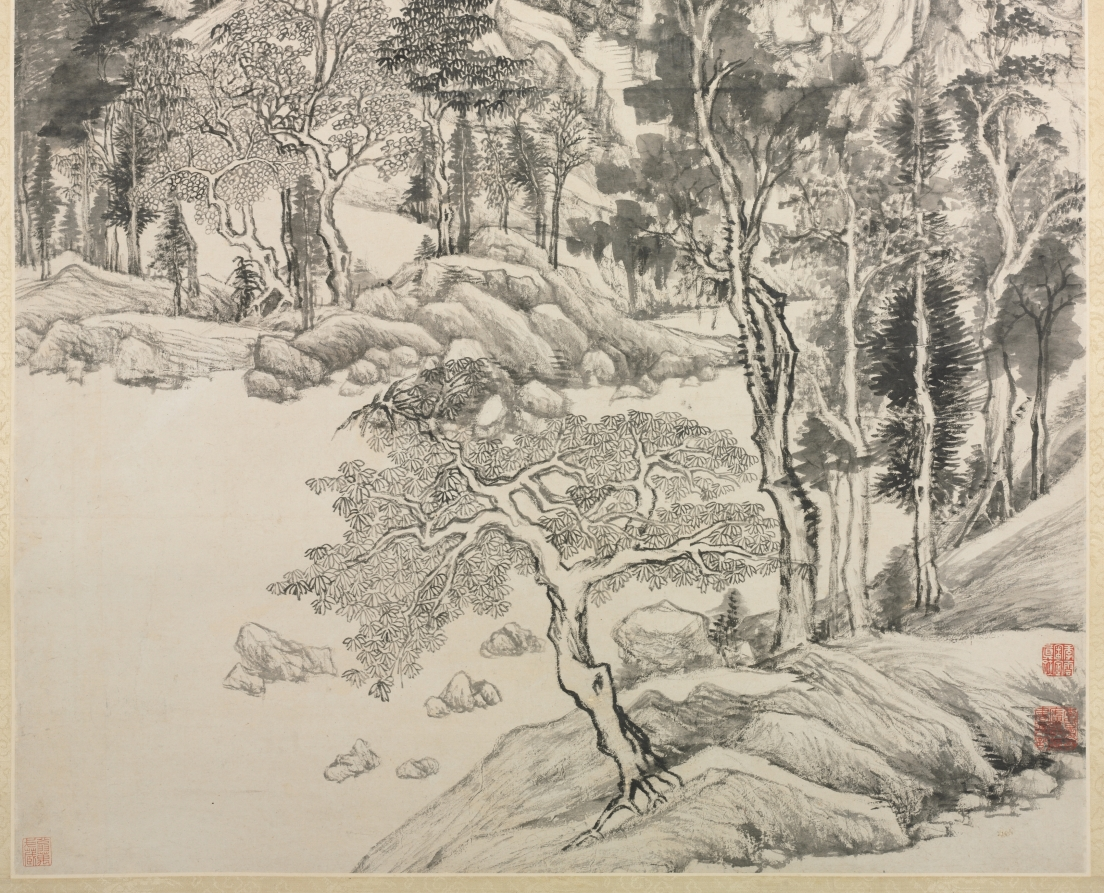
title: Mt. Qingbian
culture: China, Ming dynasty (1368–1644)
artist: Dong Qichang (Chinese, 1555–1636)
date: 1617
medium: hanging scroll, ink on paper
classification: Painting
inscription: Artist's first inscription, signature, and 2 seals: A painting of the Qingbian Mountains in the manner of Beiyuan [Dong Yuan]. In the summer of the dingsi year [1617], on the last day of the fifth month, [I] send this to my senior, Zhang Shenqi. Dong Xuanzai [seals] Zhi zhi hao ri jiang guan 知制誥日講官; Dong Qichang yin 董其昌印.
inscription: Artist's second inscription and signature: Piling irons for ten thousand feet guard the purple sky;/ Where puppies are seen on top of clouds, villages and marketplaces lie./ In the splendor of autumn, where is the most worthy spot to spend the day?/ Amid the rustling sounds of mountain streams, with a volume in hand, meditating on the Way [Dao]. Inscribed by Qichang. (trans. WKH/LYSL)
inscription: 4 additional seals: 3 of Li Enqing 李恩慶 (jinshi of 1833); 1 of Weng Wan-go 翁萬戈 (b. 1918).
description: Dong Qichang radically transforms the landscape composition into a purely abstract design. He organizes the mountain forms to achieve an overall sense of structure, activating the flow of energy (qi) and the momentum of force (shi) throughout the pictorial design. In his art, brush and ink assume life independent of the depicted forms, so that the painting can be appreciated for “the sheer marvels of brush and ink.”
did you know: Dong Qichang had visited the Bian Mountains, which are part of a low range located not far from Wuxing and Lake Tai in the southern province of Zhejiang.